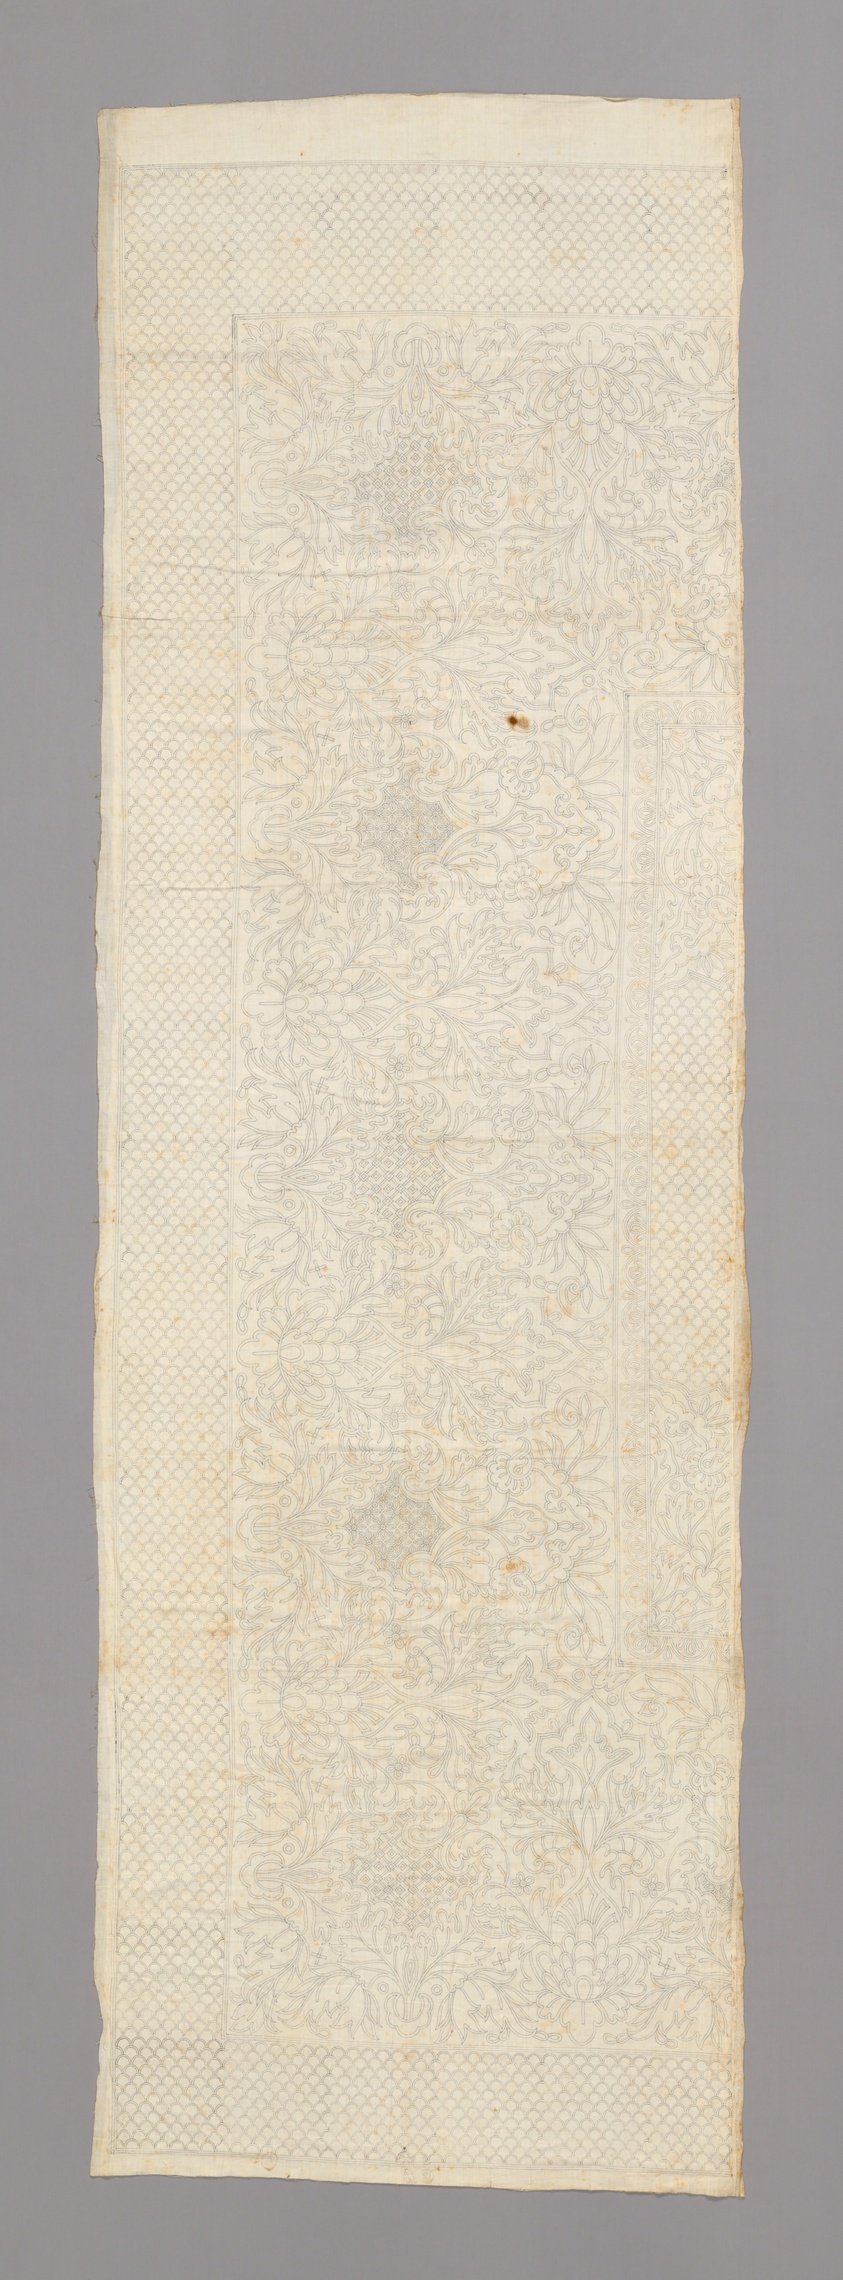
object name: Textile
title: bedcover (Unfinished in three sections)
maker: France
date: 18th century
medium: Cotton, plain weave, quilted in parts, design stamped in ink, lined with cotton, plain weave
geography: France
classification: needlework - quilt; textile